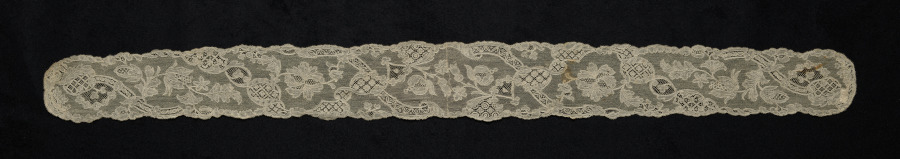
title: Lace Lappet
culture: Belgium, Mechelen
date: 1700s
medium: Linen: bobbin lace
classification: Lace